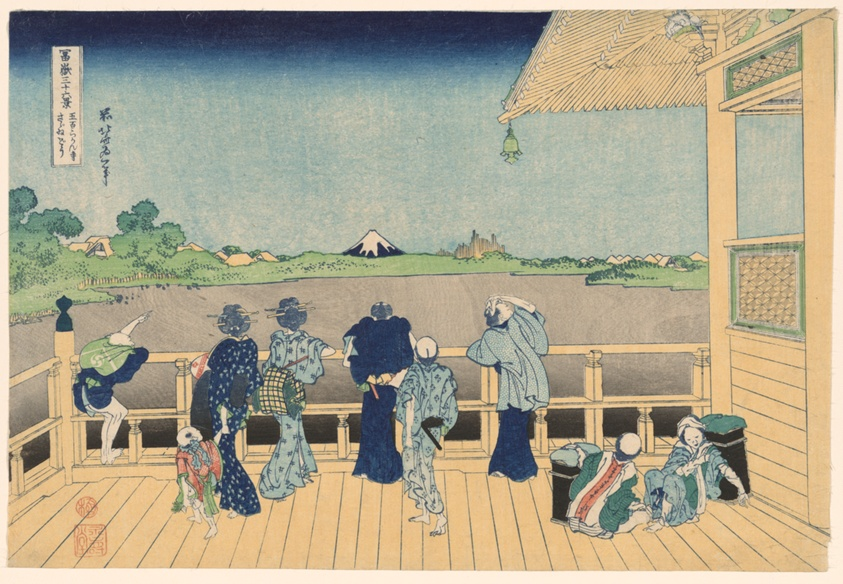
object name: Print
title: Sazai Hall at the Temple of the Five Hundred Arhats (Gohyakurakanji Sazaido), from the series "Thirty-six Views of Mount Fuji (Fugaku sanjurokkei)"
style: Japanese (culture or style)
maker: Katsushika Hokusai 葛飾 北斎; Japanese, 1760-1849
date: c. 1830/33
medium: Color woodblock print; oban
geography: Japan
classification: woodblock print; print; asian art